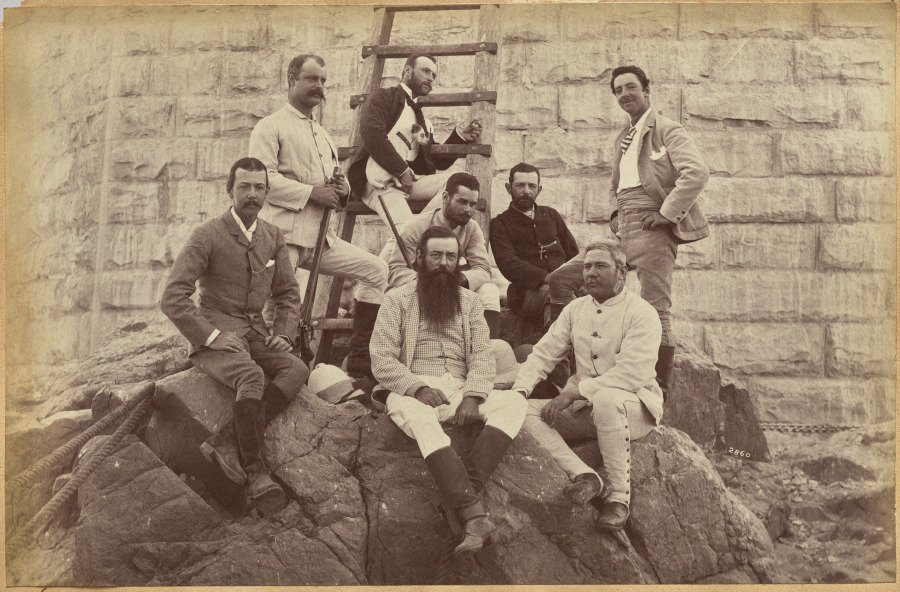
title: Managing staff of Meprs. Glover & Co. at Sindh Bridge (recto, top)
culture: India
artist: Raja Deen Dayal (Indian, 1844–1905)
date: c. 1882–87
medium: albumen print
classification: Photograph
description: These photographs are part of an album, now disassembled, of around 105 photographs taken in India between 1885 and summer 1887 that provide glimpses into the lives of the British colonial elite and royal and upper-class Indians. The museum holds another group of 37 pictures from this album (2016.266), which was probably commissioned by a British civil servant visiting or working in India around 1888 as a personal souvenir of his experiences there.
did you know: Raja Deen Dayal is regarded now, and was considered during his lifetime, to be India’s most important 19th-century photographer.